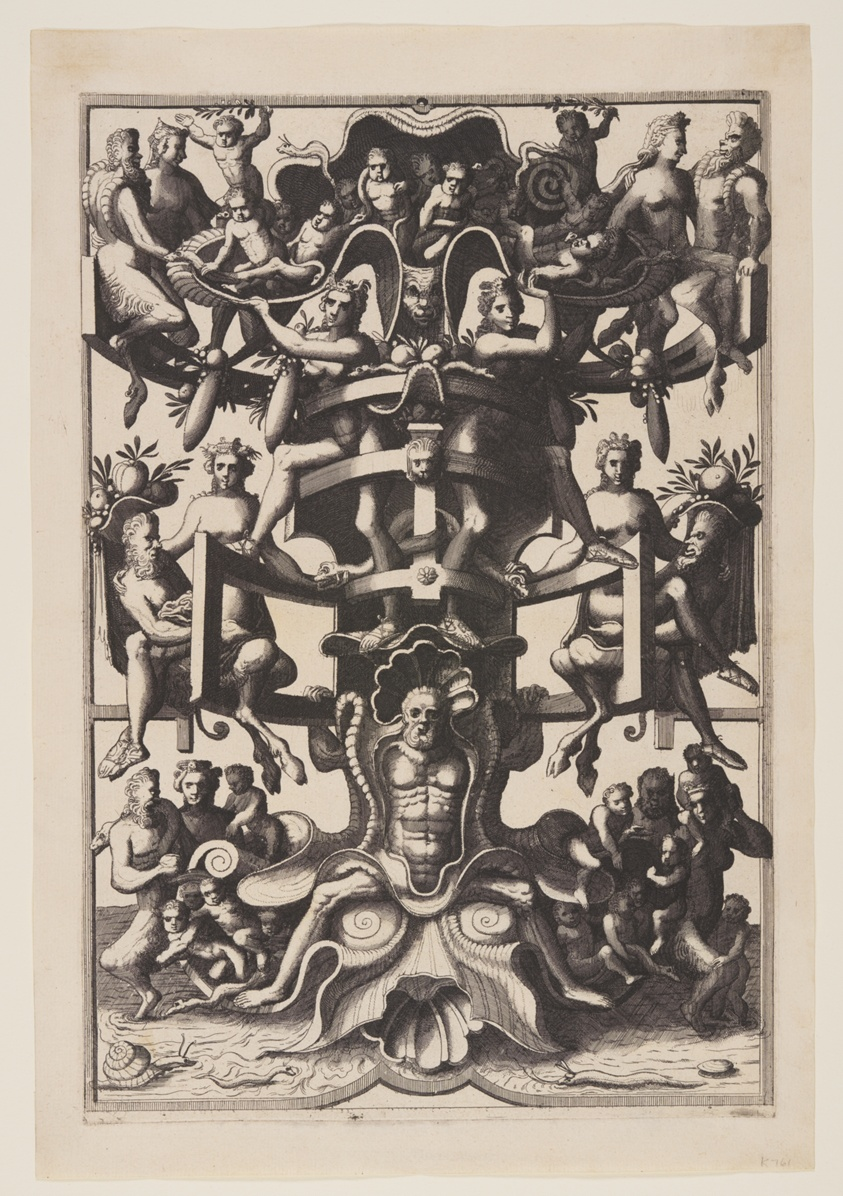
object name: Print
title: Man Sitting on an Auricular Mask, from Veelderleij niewe inventien van antijcksche sepultueren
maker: Johannes van Doetecum (Netherlandish, 1528/32–1605) and Lucas van Doetecum (Dutch, died before 1584); after Cornelis Floris (Flemish, 1514-1575)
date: 1557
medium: Etching on ivory laid paper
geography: Netherlands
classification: print; paper; prints and drawing; etching